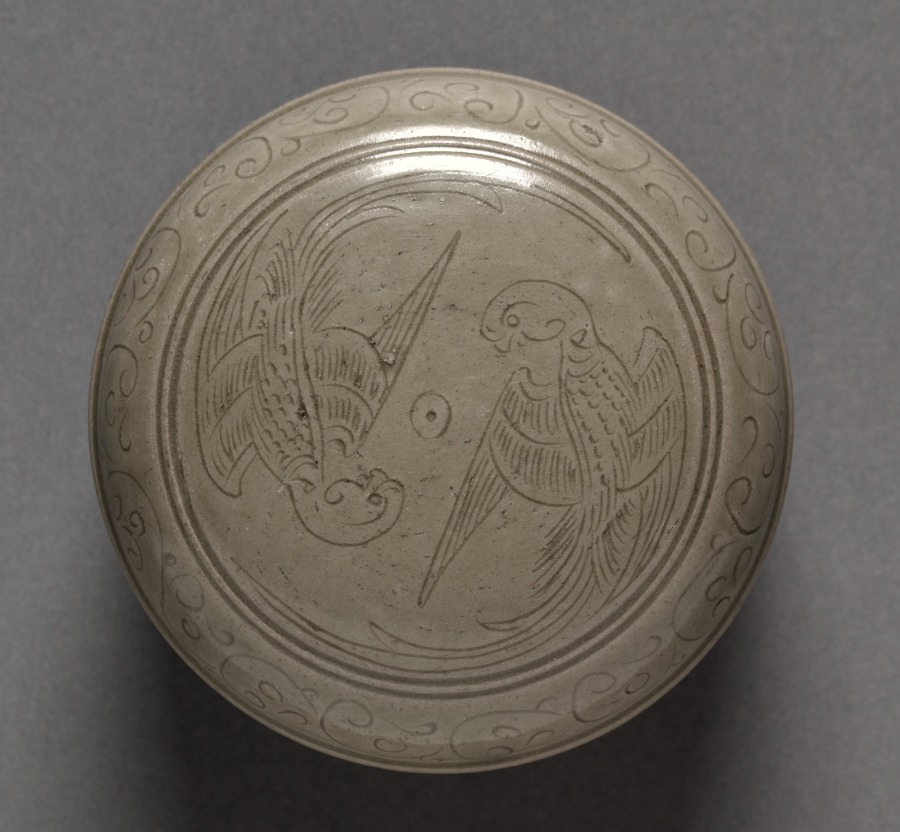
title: Covered Box with Double-Parakeet Design (lid)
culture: China, Zhejiang province, Five dynasties (907-60) or later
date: 900s-1100s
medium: Glazed stoneware with incised decoration, Yue ware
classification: Ceramic